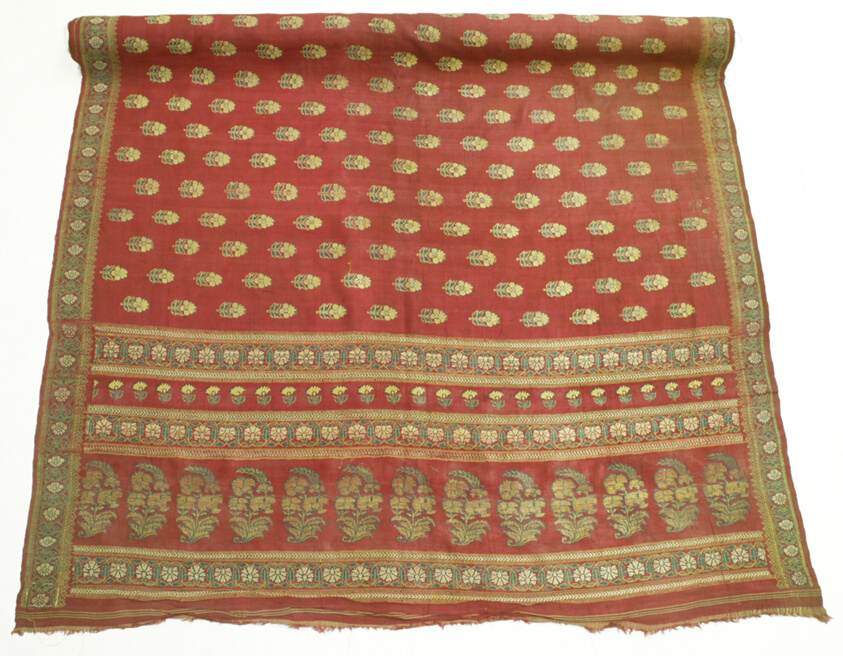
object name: Costume and Accessories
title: Sari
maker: Eastern India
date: 19th century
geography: India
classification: textile; weaving; costume; dress (garment); clothing; sari (garment)